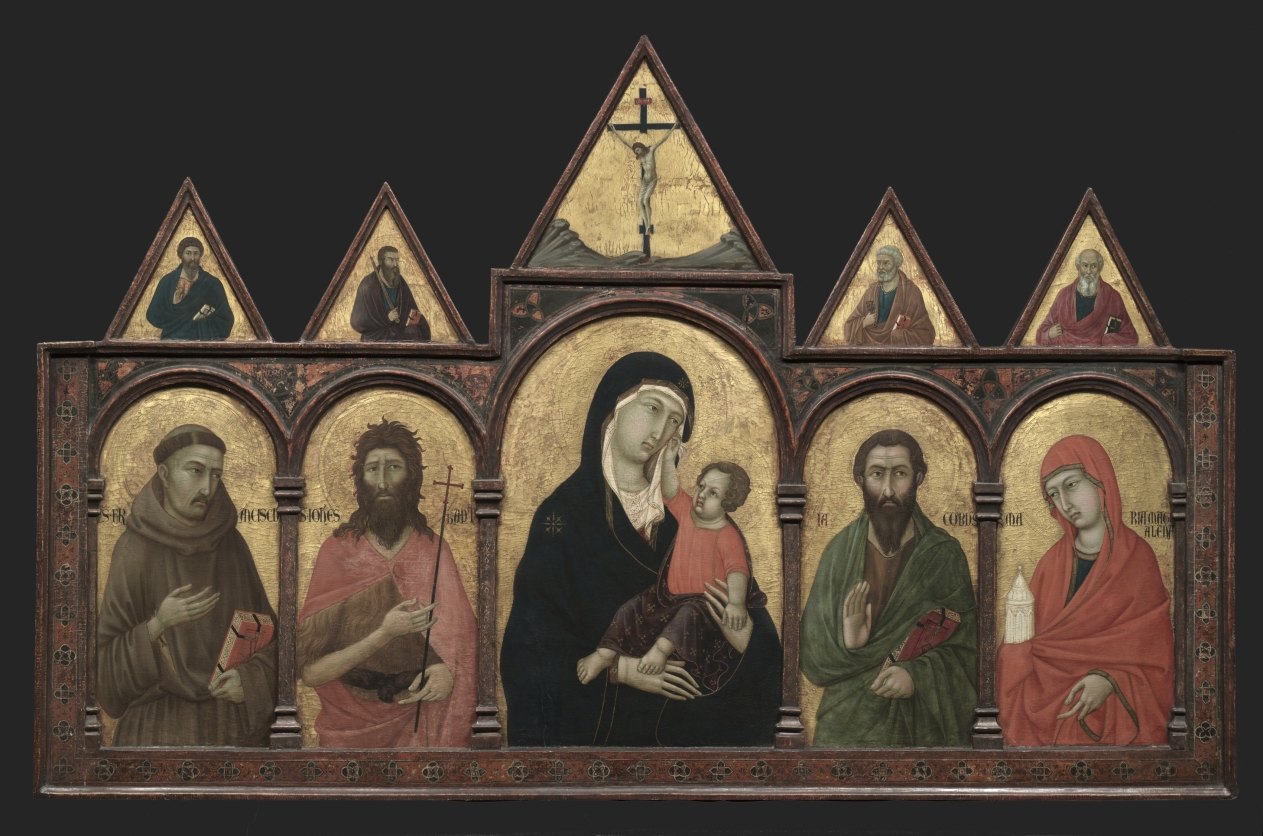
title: Virgin and Child with Saints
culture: Italy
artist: Ugolino di Nerio (Italian)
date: c. 1320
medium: tempera and gold on wood panel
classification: Painting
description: In medieval Italian churches, painted altarpieces served as the focal point for worshippers during the rituals of faith. The figures of Jesus, Mary, and eight saints are framed by a golden background that would have glistened in the flickering candlelight of the church.